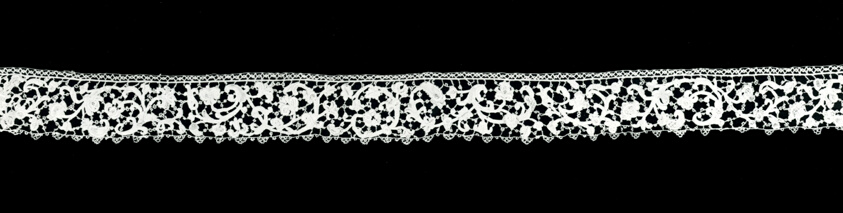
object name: Textile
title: Border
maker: Italy, Venice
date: 1675/1700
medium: Linen, raised needle lace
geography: Venice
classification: textile; lace - needle